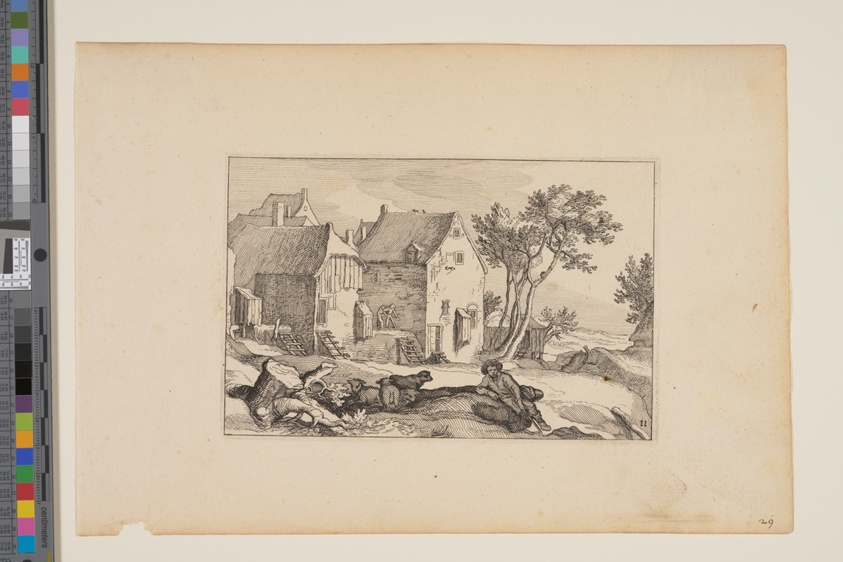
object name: Print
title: A Farmyard, Resting Shepherd in Centre Foreground, from Landscapes (Verscheyden aerdige Lanthuysen...)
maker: Claes Jansz. Visscher (Netherlandish, c. 1550–c. 1612); after Abraham Bloemaert (Dutch, 1566–1651)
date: 1620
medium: Etching on ivory laid paper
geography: Netherlands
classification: print; paper; prints and drawing; etching